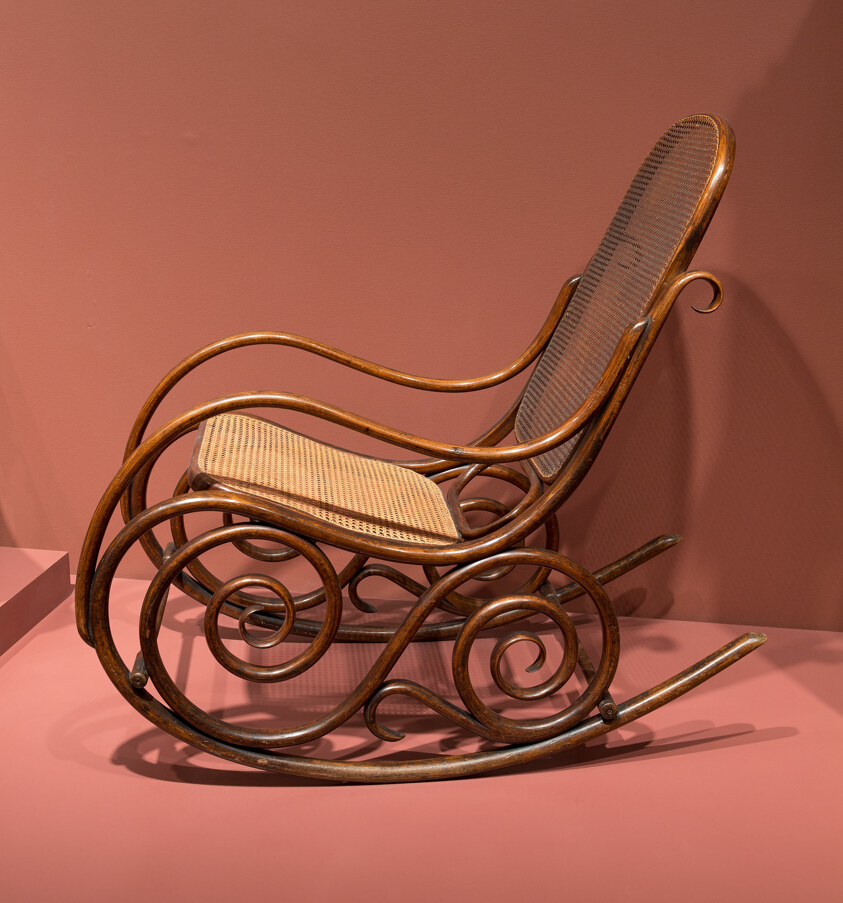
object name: Furniture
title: Rocking Chair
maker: Made by Jacob And Josef Kohn; Austria, Vienna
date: c. 1881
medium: Beech and caning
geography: Austria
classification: chair; seating; furniture; european decorative arts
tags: furniture